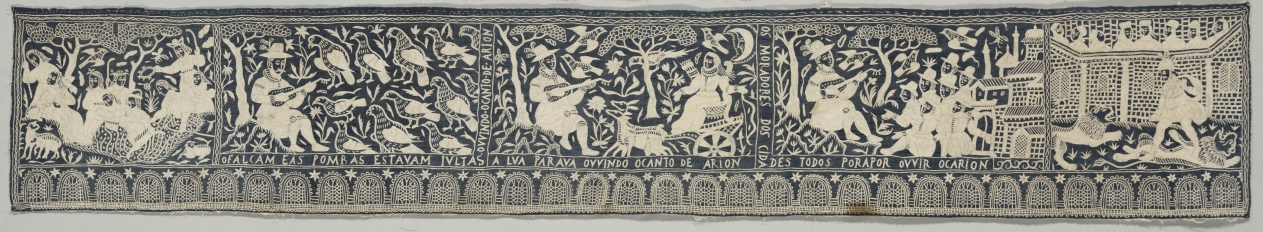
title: Valence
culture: Portugal, 18th-19th century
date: 18th-19th century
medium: embroidery; silk on linen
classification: Embroidery